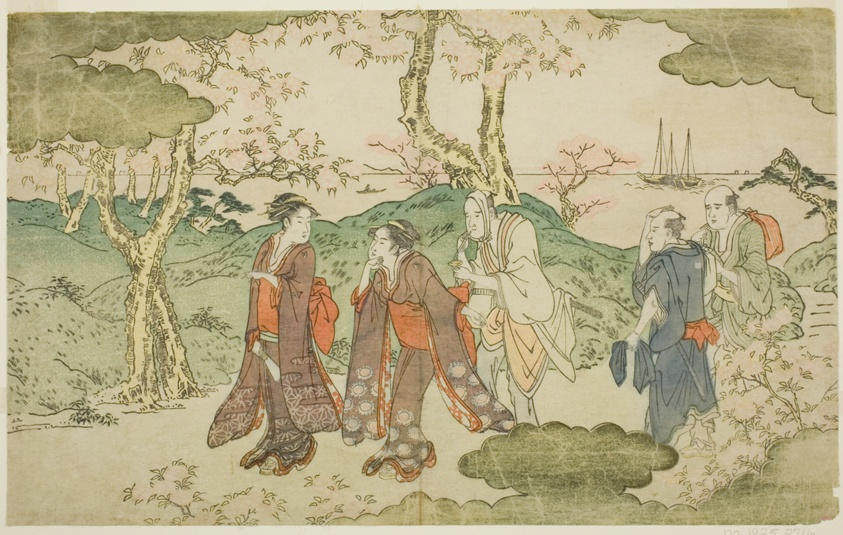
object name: Print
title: Mount Goten, from the illustrated book "Statue of Fugen (Fugen-zo)"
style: Japanese (culture or style)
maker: Kitagawa Utamaro 喜多川 歌麿; Japanese, 1753 (?)-1806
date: c. 1790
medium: Color woodblock print; double-page illustration from book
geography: Japan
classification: woodblock print; print; asian art